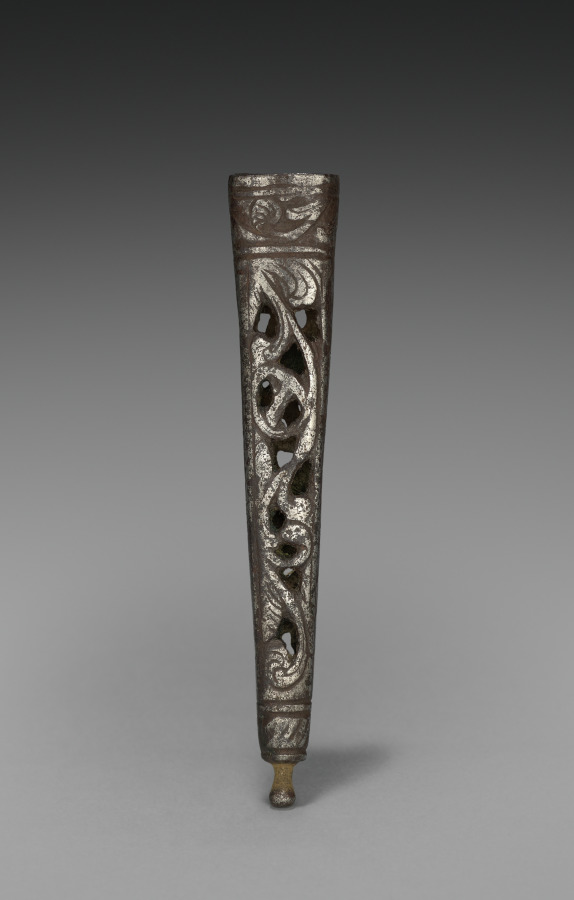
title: Sheath Tip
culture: Italy, 17th century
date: 1600s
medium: steel, pierced and chiseled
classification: Arms and Armor